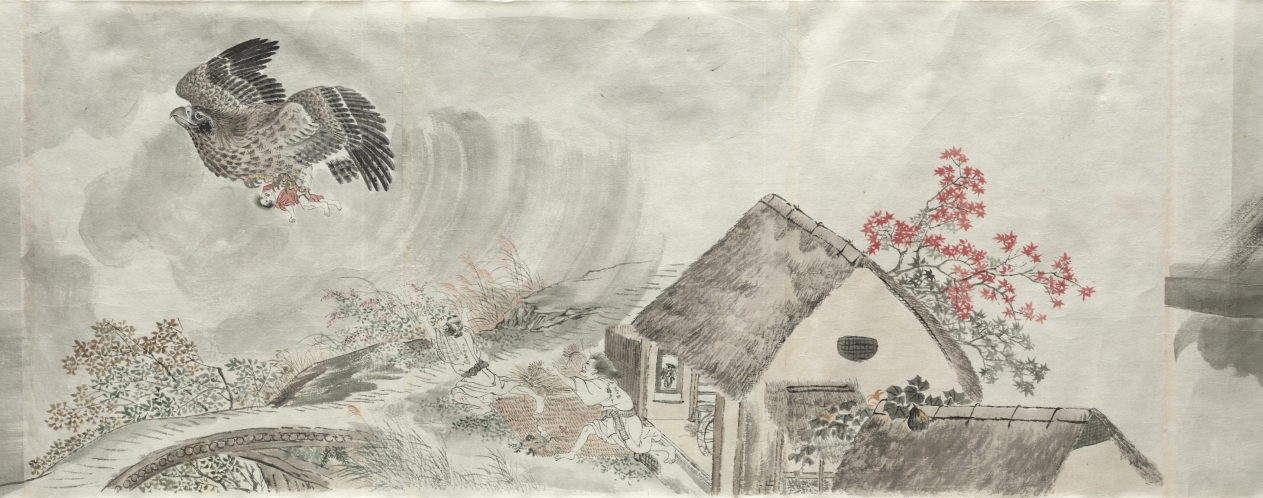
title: Sketch Copy of Natural Disasters, from the Seven Fortunes and Misfortunes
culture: Japan, Edo period (1615–1868) to Meiji period (1868–1912)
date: after 1773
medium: handscroll; ink and color on paper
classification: Painting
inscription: Signed: Gettcho; dated 1773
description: This unmounted handscroll is a copy of the first of a three-scroll set painted by Maruyama Ōkyo (1733–1795) for Buddhist monk Yujō (1723–1773). It depicts people's unfortunate encounters with forces of nature from wind to beasts. Ōkyo's realistic, contemporary imagery was meant to evoke a sense of recognition and empathy in viewers, shocking them into avoidance of possible punishments.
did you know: Notations that appear throughout the scroll indicate colors and other details of the original painting.